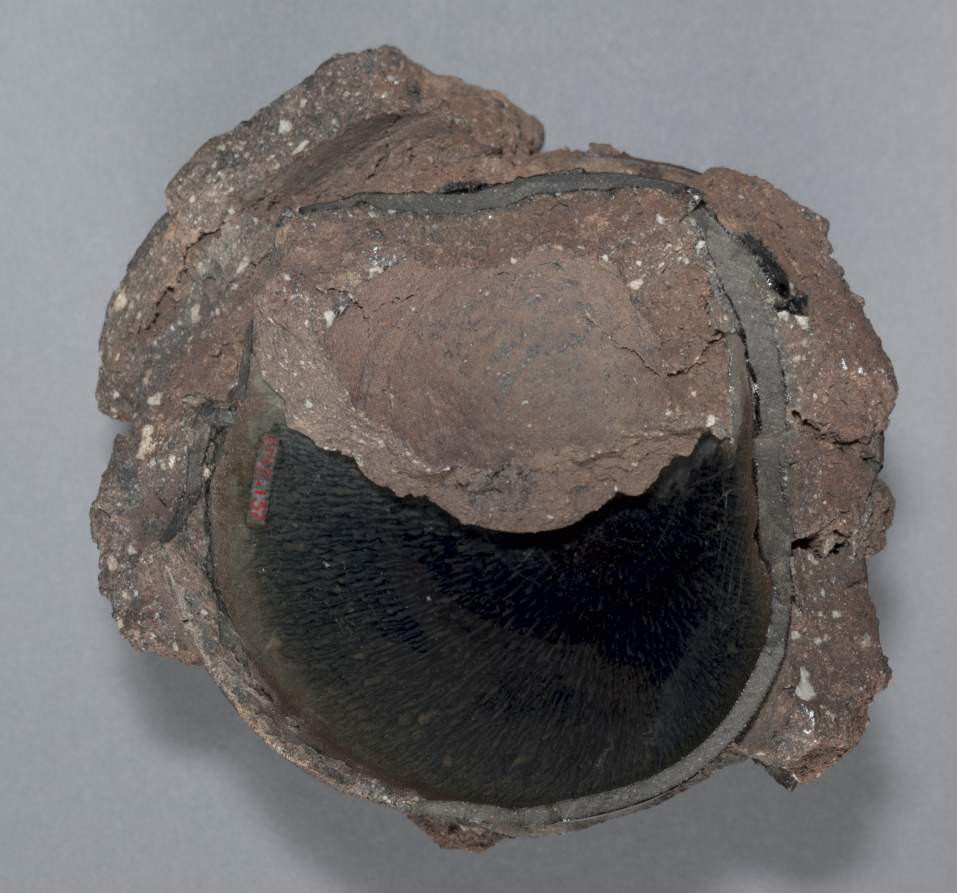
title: Saggers and Bowl Fragments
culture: China, near Shui ch'i, Song dynasty (960-1279)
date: 960–1279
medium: stoneware with "hare's fur" glaze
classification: Ceramic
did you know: A sagger is a ceramic box-like container used to protect pottery while being fired inside a kiln.